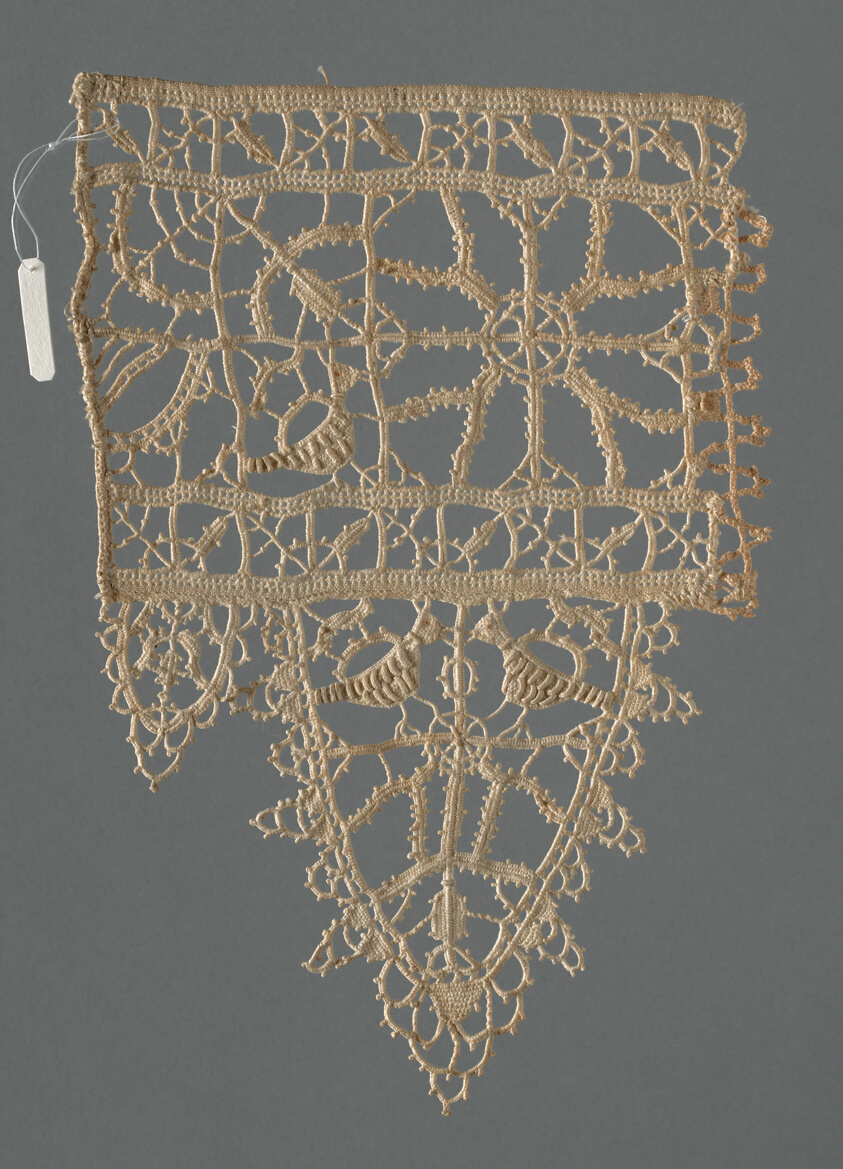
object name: Textile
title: Fragment (Border)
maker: Italy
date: 16th century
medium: Linen, needle lace work on a plain weave cut and drawn threadgrid; glass beads; embroidered in double hem and overcast stitches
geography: Italy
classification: textile; lace - needle